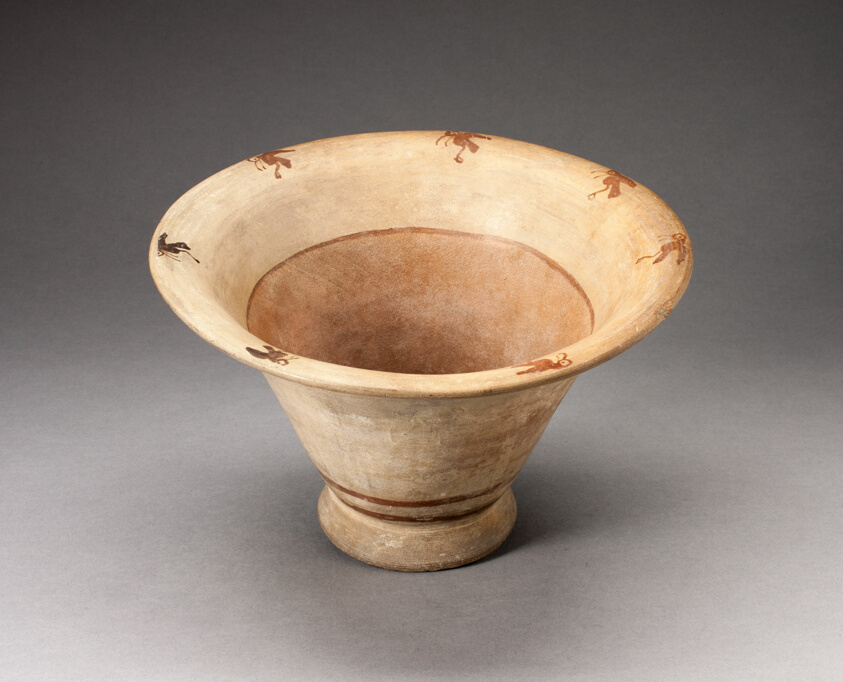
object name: Vessel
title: Flaring Bowl Depicting Abstract Birds on the Inner Rim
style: moche, Arts of the Americas, andes, south american, andean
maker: Moche (North coast, Peru)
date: 100 BCE–500 CE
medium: Ceramic and pigment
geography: Peruvian North Coast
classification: bowl; earthenware; ceramics; vessel; art of the americas